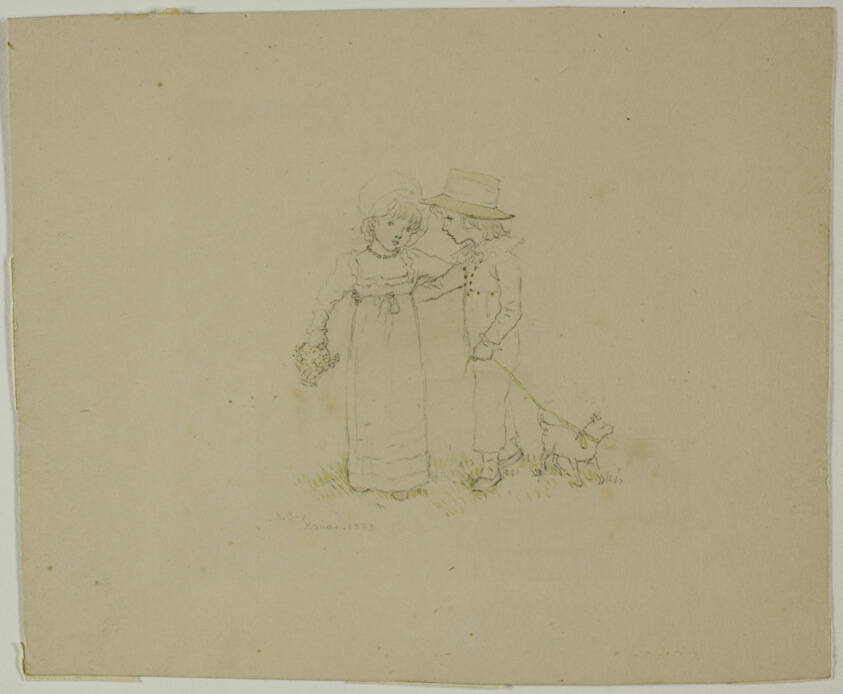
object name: Drawing and Watercolor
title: Two Children with Dog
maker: Kate Greenaway (English, 1846-1901)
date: 1883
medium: Graphite with watercolor on ivory wove paper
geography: England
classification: graphite; drawings (visual works); prints and drawing